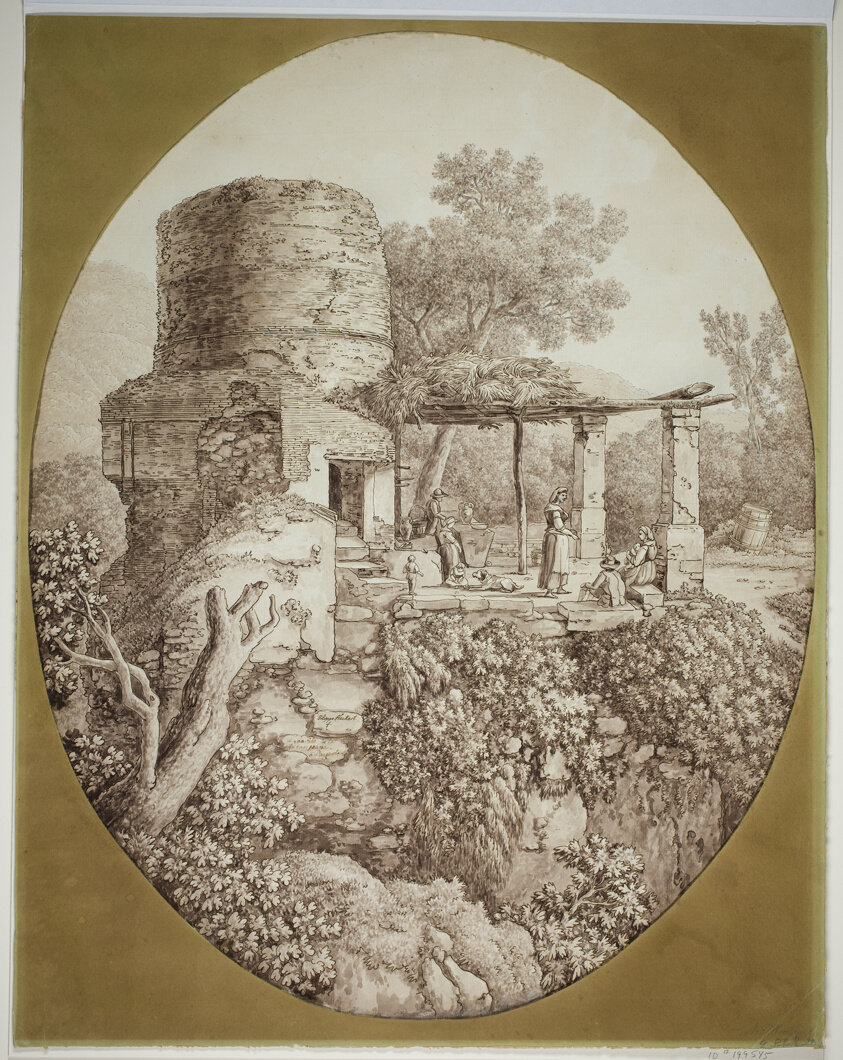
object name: Drawing and Watercolor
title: Group of People on a Terrace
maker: Jacob Philipp Hackert (German, 1737-1807)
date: 1797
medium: Pen and brown ink and brush and brown wash, with graphite and traces of white gouache, on cream laid paper, laid down on cream laid paper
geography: Germany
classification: prints and drawing; brush and wash; pen and ink drawings; drawings (visual works)